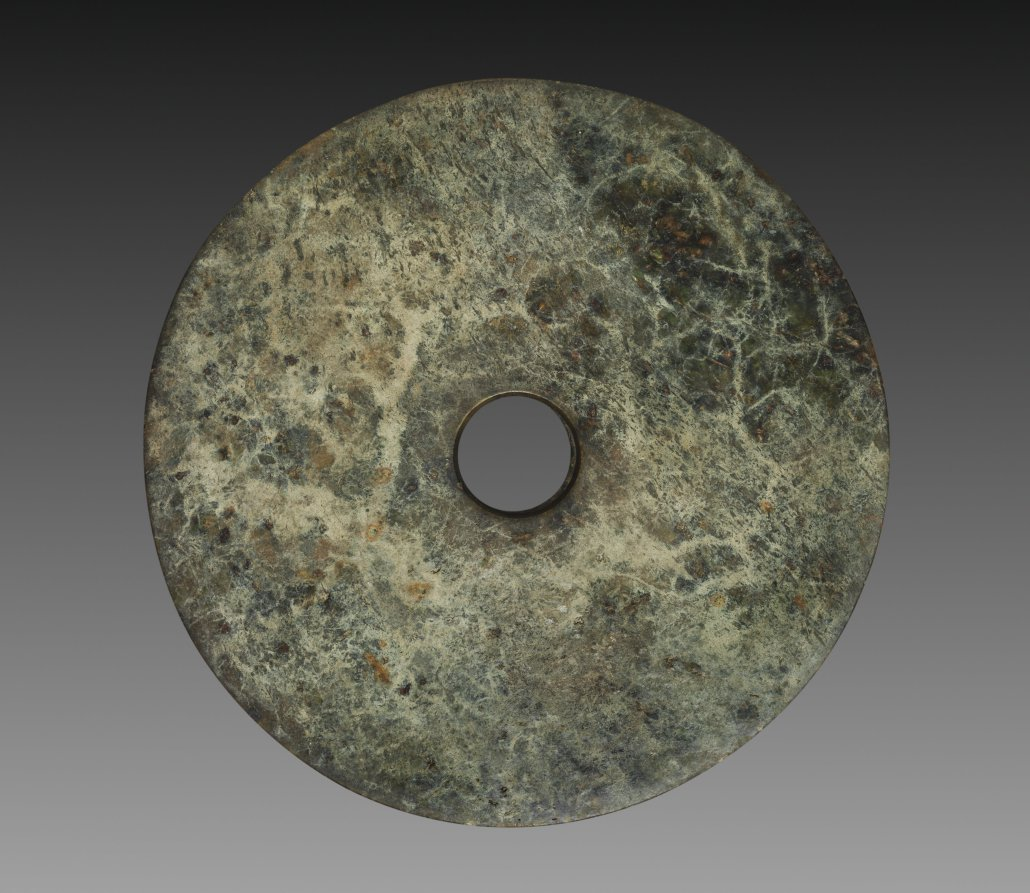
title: Ceremonial Disc (Bi)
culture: East China, Neolithic period, Liangzhu culture (3300–2200 BCE)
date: 3300–2200 BCE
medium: jade (nephrite)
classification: Jade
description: The Liangzhu culture, one of the later Neolithic cultures of East China, excelled in jade working. Exceptionally large versions like this disc are rare and usually occupied pride of place on the chest of the buried. Traditionally called bi, these plain discs, together with cong, squared cylinders, form an essential ritual pair in Liangzhu burials of high-status individuals.